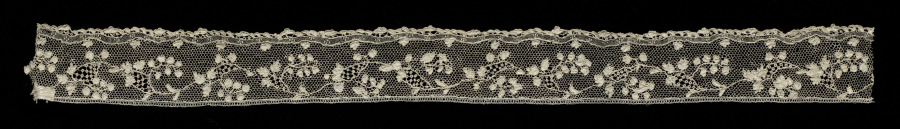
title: Lace Edging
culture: France, Argentan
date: 1700s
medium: Linen: needle lace (Point de Argentan)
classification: Lace